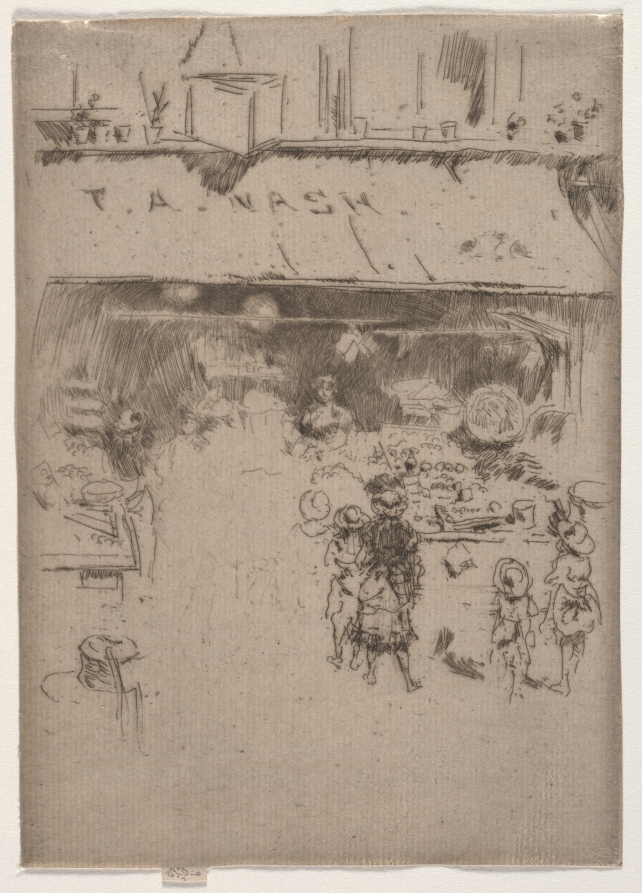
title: Nash's Fruit Shop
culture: America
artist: James McNeill Whistler (American, 1834–1903)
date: 1887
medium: etching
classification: Print